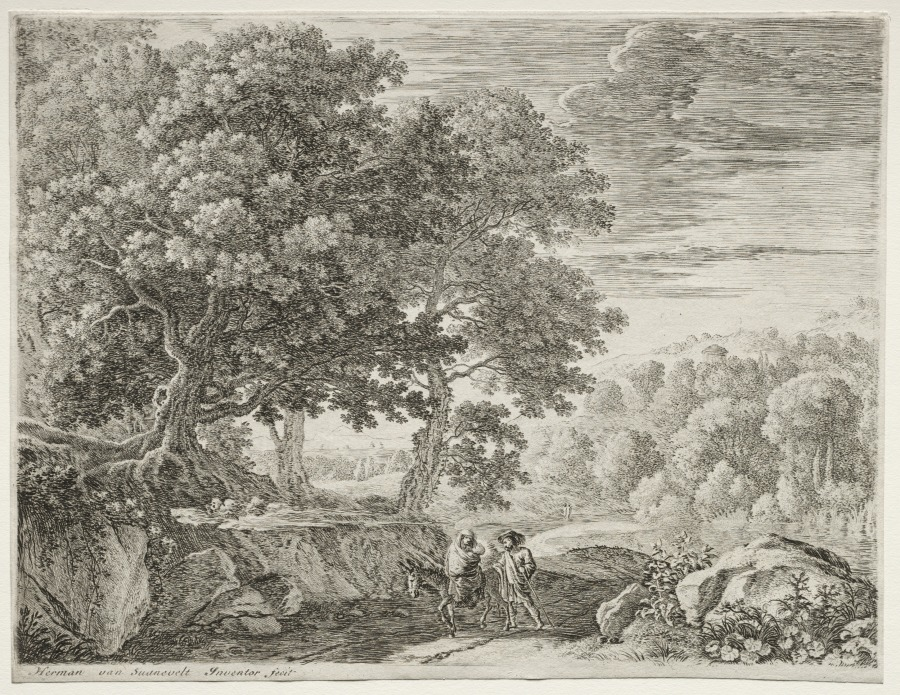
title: The Flight into Egypt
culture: Netherlands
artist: Herman van Swanevelt (Dutch, c. 1600–1655)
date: c. 1652–54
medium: etching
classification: Print